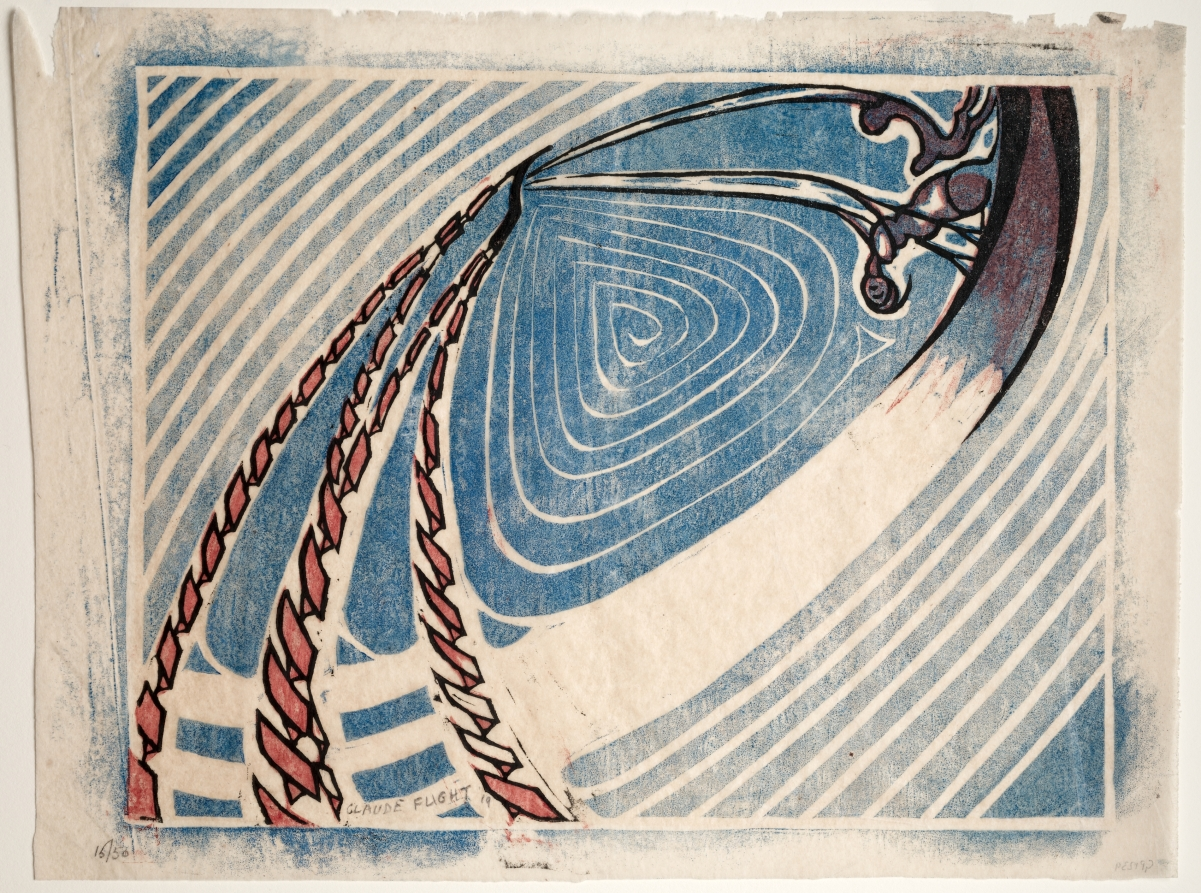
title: Swing Boats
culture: England, 20th century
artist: Claude Flight (British, 1881–1955)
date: 1919–1921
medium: color linocut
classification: Print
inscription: Lower left, in graphite: Claude Flight 9; 15/50